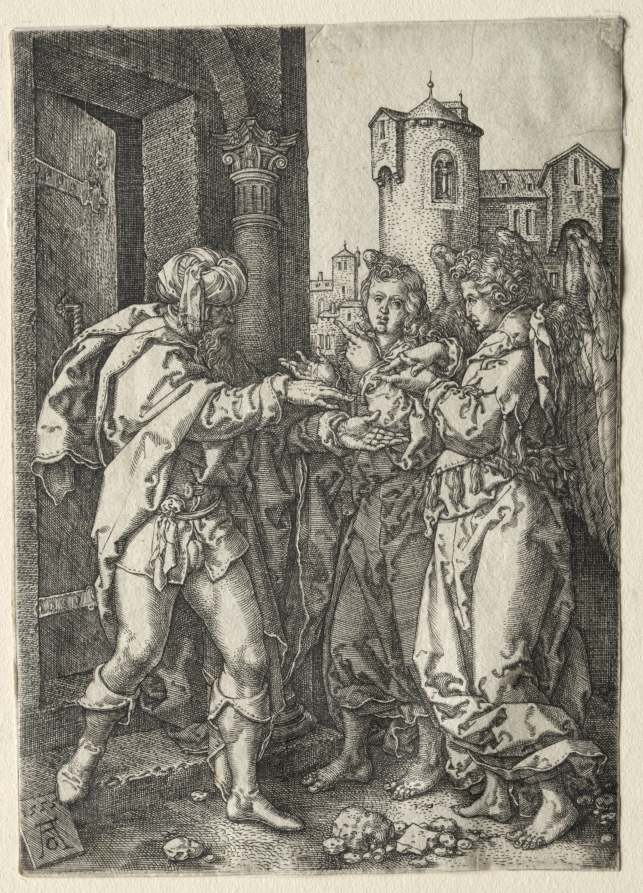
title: The Story of Lot: Lot Welcomes the Angels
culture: Germany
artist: Heinrich Aldegrever (German, 1502–1555/61)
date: 1555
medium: engraving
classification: Print